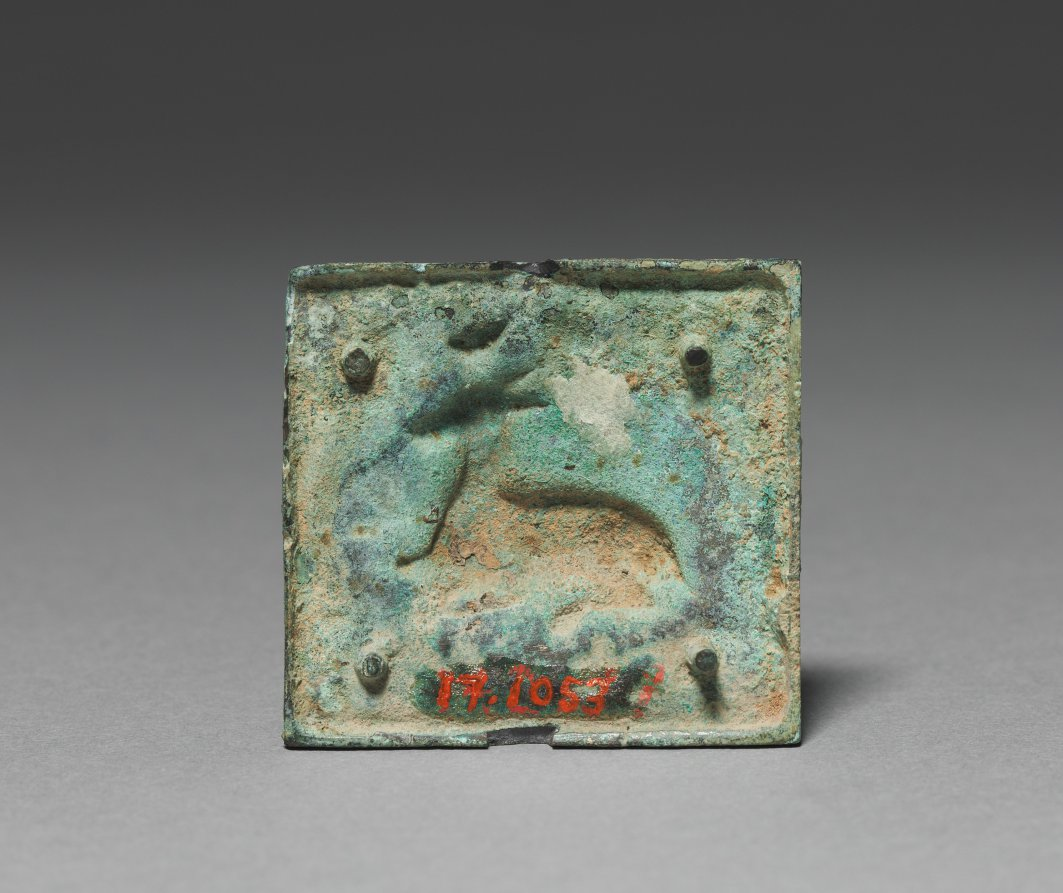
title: Belt Ornament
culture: Korea, Goryeo dynasty (918–1392)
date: 1100s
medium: gilt bronze with repoussé relief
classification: Metalwork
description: Metallurgy advanced remarkably in the Goryeo period (918-1392), explaining why a large quantity of sophisticated metal artifacts with delicate designs were used not only as daily accessories but also as burial goods. Belt ornaments like this example were fixed to leather belts. Surround by intricate arabesque patterns, a seated dear was done in the repoussé technique. Such animal motifs were widely shared among Eastern Eurasian tribes, from where the first settlers in the Korean peninsula originated.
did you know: The Japanese antique dealer Yamanaka & Company, which opened its branches in New York (1895) and Boston (1899), sold small Korean archaeological materials such as this belt ornament to American collectors in the early 20th century.